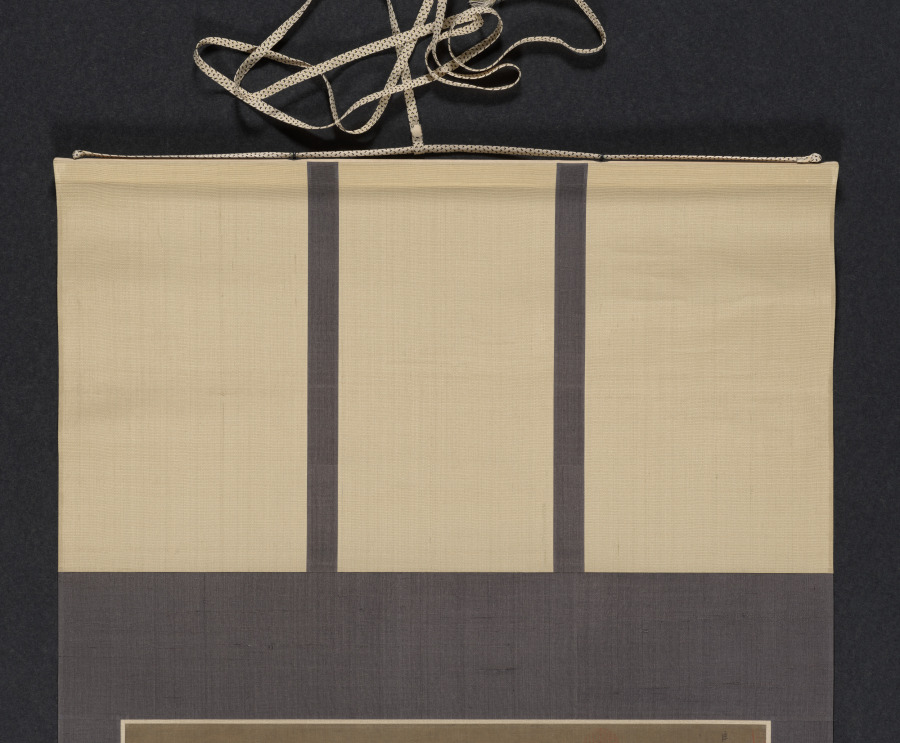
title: Buddhist Retreat by Stream and Mountains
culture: China, Northern Song dynasty (960-1127)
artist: Juran (Chinese, active 960–985)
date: 960–85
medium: Hanging scroll; ink on silk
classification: Painting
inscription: The upper portion of the scroll: the two small characters, “Ju wu 巨五”, written near the large seal. Written by a functionary in Shang Shu Sheng (the Department of State Affairs) when the painting was first received.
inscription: The upper portion of the scroll: the large seal, “Shang Shu Sheng yin 尚書省印” (seal of the Department of State Affairs)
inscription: The upper portion of the scroll: the half-seal “Si yin 司印”, seen along a border. Attributed to 典禮紀察司 of Ming dynasty.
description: Monk Juran served the Southern Tang (937–75) imperial house in Nanjing, where he studied with Dong Yuan (active 930s–60s). Both founded the southern landscape tradition, or Jiangnan school, known for gentle misty riverscapes in wet ink. Juran moved north to Kaifeng when the Southern Tang surrendered to the Northern Song, the impact of which may be seen in this painting, presumably painted after 976. A towering mountain dominates the composition, typically representing the style of the Northern Song academy; while the use of long hemp fiber strokes to texture the mountains, wet dots, and round boulders on mountain tops are elements of the southern landscape tradition.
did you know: This hanging scroll with the towering mountain is a prime example of the monumental landscape style of Northern Song.